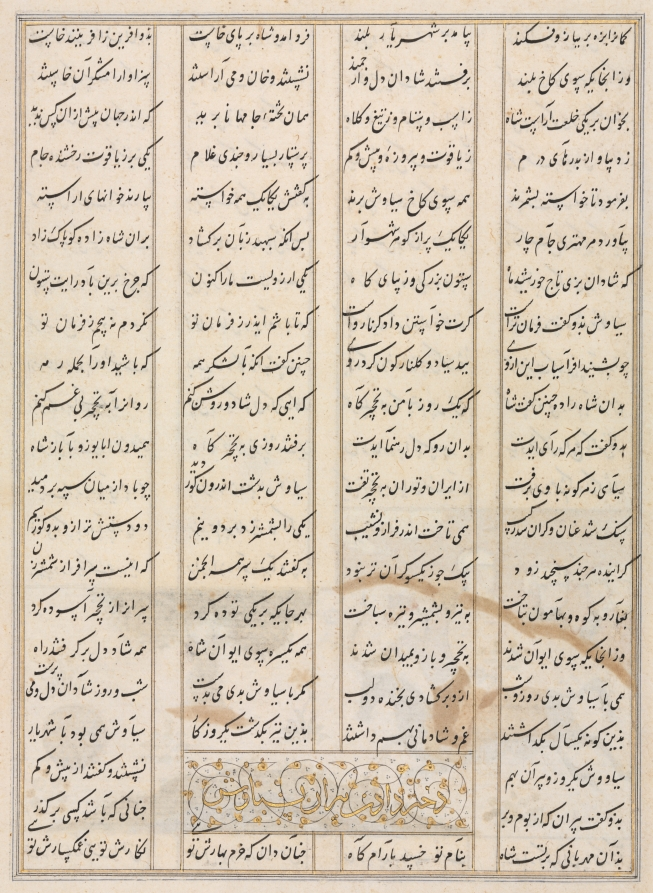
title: Persian verses (verso) from a Shahnama (Book of Kings) of Firdausi (940-1019 or 1025)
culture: Iran, Shiraz, Timurid period (1370-1501)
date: late 1400s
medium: opaque watercolor, ink, and gold on paper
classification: Manuscript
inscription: script: Nasta'liq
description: A prince from Iran’s early legendary history, Siyavush was sent by his father, the shah, to train under the great warrior Rustam in the arts of hunting, archery, and horseback riding. In the painting on the other side of this page, Siyavush demonstrates his considerable skill by hitting the bulls eye on a rolling target from horseback. The gold sky, pastel ground with grassy tufts, and dense leafy riverbank are distinctive features of Persian painting during this period.